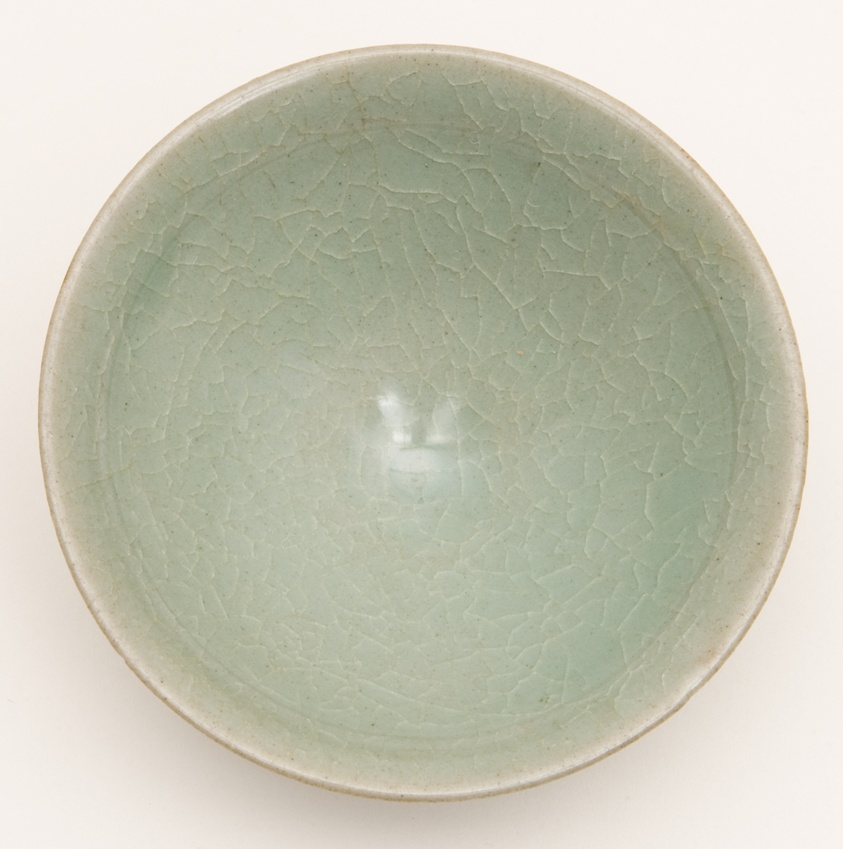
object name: Vessel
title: Conical Bowl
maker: China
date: Southern Song dynasty (1127–1279)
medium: Longquan ware, glazed stoneware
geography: China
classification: vessel